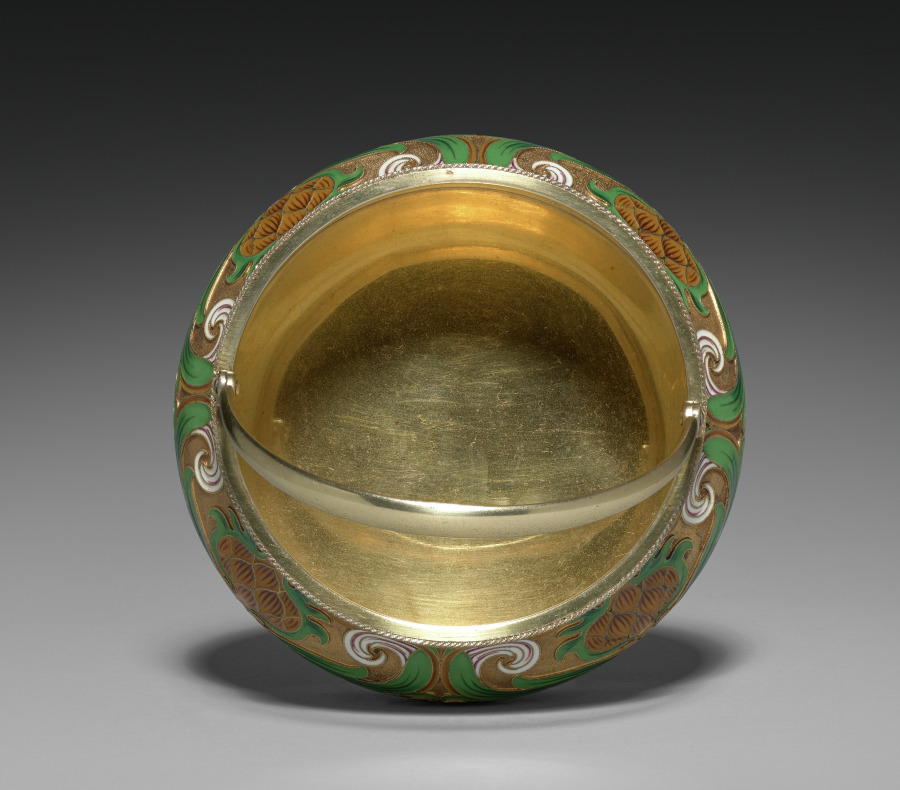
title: Jam (Varenye) Basket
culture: Russia, St. Petersburg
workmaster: attributed to Feodor Ivanovich Rückert (Russian, 1840–1917)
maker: House of Fabergé (Russian, 1842–1918)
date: 1887–96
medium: silver gilt, opaque cloisonné enamel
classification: Miscellaneous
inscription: 84, St. George [assay mark for Moscow, 1882-1896]; C. Fabergé (in Cyrillic); double-headed eagle [imperial warrant]; 10593 scratched.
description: A particularly Russian component of this tea service is this little basket, meant to hold fruit preserved in a sweet juice, called varenye. At Russian tea, varenye was strained and served over cakes or biscuits in a similar way that the English take jam with scones at high tea.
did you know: This jam (varenye) basket is part of a larger tea set.